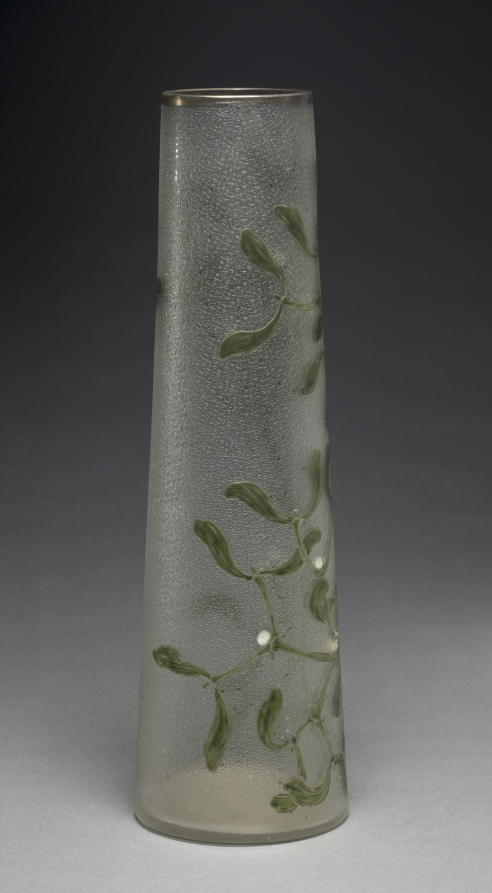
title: Tall Vase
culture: France, Clichy, late 19th-early 20th Century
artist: attributed to Appert Frères (French)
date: c. 1900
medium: glass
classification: Glass